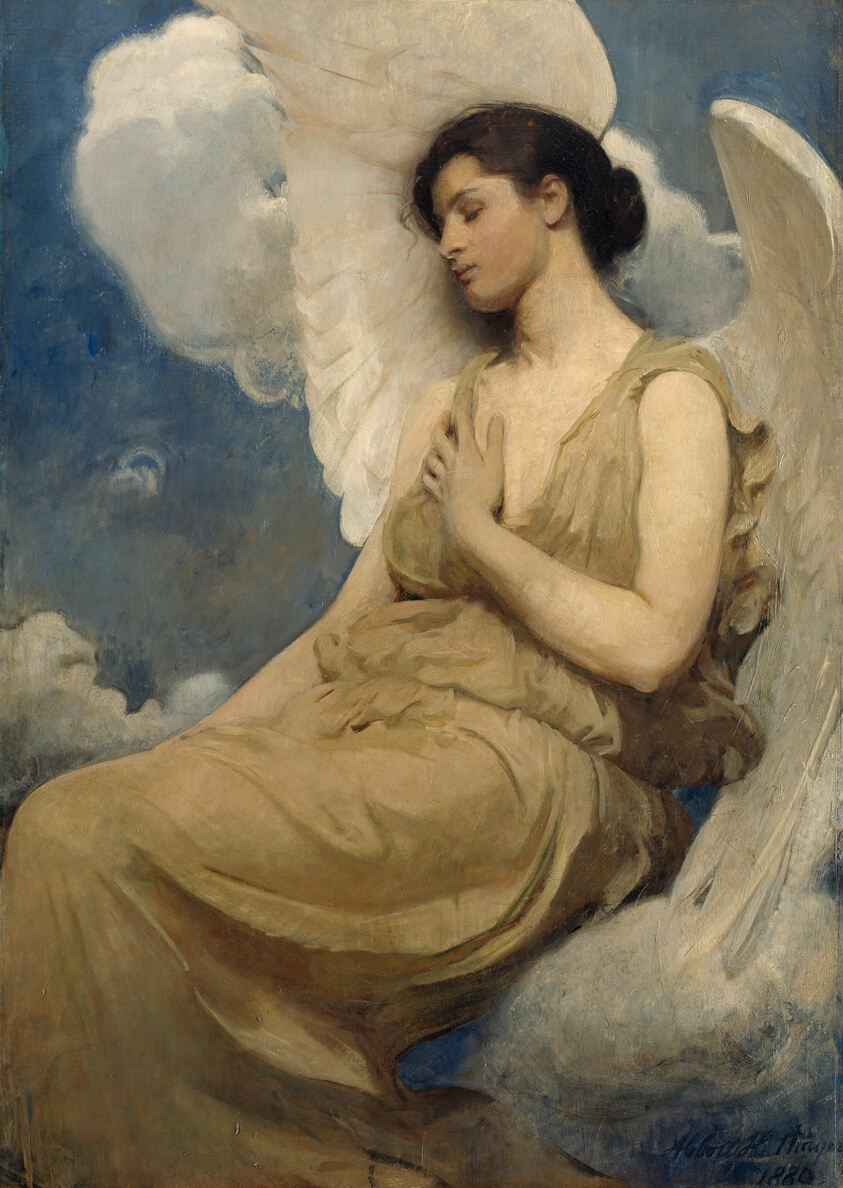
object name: Painting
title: Winged Figure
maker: Abbott Handerson Thayer (American, 1849–1921)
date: 1889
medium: Oil on canvas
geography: United States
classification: painting; american arts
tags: mythology, people, portraits